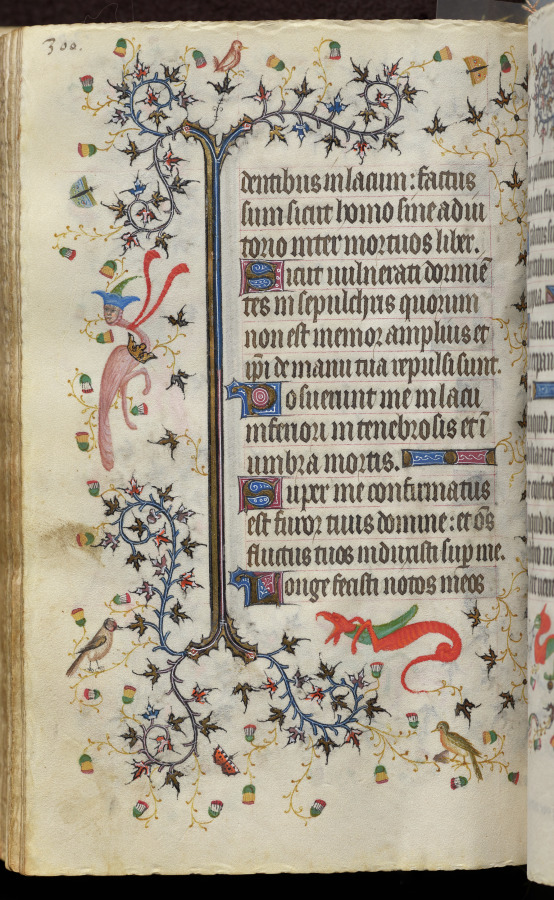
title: Hours of Charles the Noble, King of Navarre (1361-1425): fol. 150v, Text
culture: France, Paris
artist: Master of the Brussels Initials and Associates (French)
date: c. 1405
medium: ink, tempera, and gold on vellum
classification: Bound Volume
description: This precious volume was obviously highly prized by its owner, the French-born King of Navarre, who had his coat of arms painted on no less than twenty folios. Rather than directly commissioning this manuscript from a specific workshop, it seems that Charles the Noble acquired his book of hours -- perhaps ready-made for the luxury market -- while on a trip to Paris in 1404-05. A collaborative effort, six painting styles are evidenced within the pages of this codex, those of two Italians, two Frenchmen, and two Netherlanders. The painter who was responsible for the planning and decoration of the book, and who produced seventeen of the large miniatures, was a Bolognese artist known as the Master of the Brussels Initials. His principal assistant, responsible for most of the borders, was a Florentine who signed his name "Zecho" da Firenze on folio 208 verso.